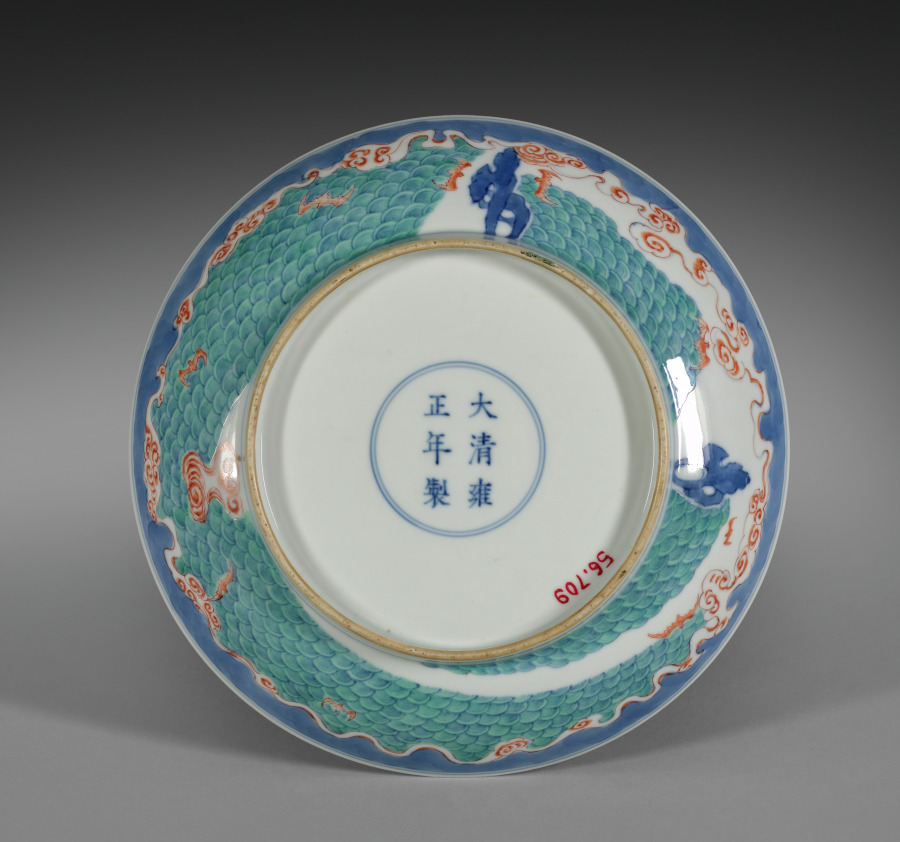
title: Plate with Isle of the Immortals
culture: China, Jiangxi province, Jingdezhen kilns, Qing dynasty (1644-1911), Yongzheng mark and reign (1723-35)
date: 1723–35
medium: porcelain decorated in underglaze cobalt blue and overglaze enamels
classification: Ceramic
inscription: 大清雍正年製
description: This multicolored dish is decorated with the sacred isle, also seen on the exterior of the blue-and-white dish nearby. A pavilion emerges amid rising and falling waves, a symbol of constant transformation and change. Above the waves are mysterious clouds, symbolizing the cosmic vital energy (qi) that animates all things and beings on earth in Daoism. The interior of the dish also shows cranes carrying sticks in their beaks, a motif that symbolizes longevity. Cranes carrying sticks above a pavilion in the sea express the wish “May you live to a ripe old age (haiwu tianchou; 海屋添籌).”